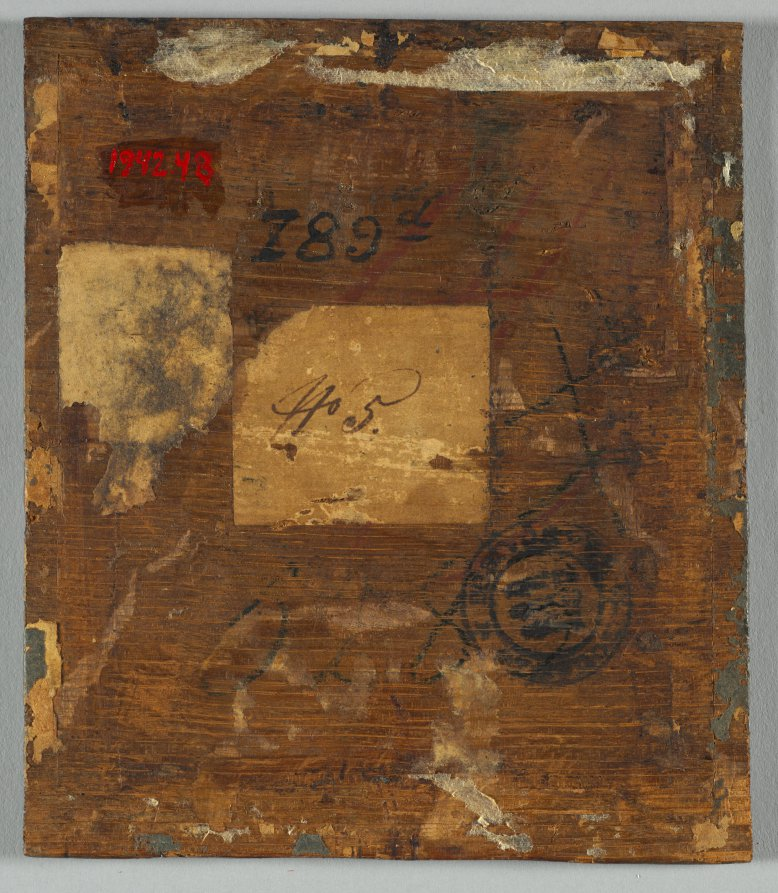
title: Portrait of a Woman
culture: Netherlandish, active France, 16th century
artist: Corneille de Lyon (Netherlandish, 1500/10–1574)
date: c. 1540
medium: oil on wood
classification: Painting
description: Corneille de Lyon worked both for the French court and wealthy merchants. His distinctive northern style stood in contrast to the taste for Italian Renaissance painting and connected closely to portrait miniatures and manuscript painting. Recent conservation treatment has restored the smooth, enamel-like background and the meticulous rendering of detail.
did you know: Gold leaf was applied to the details of the sitter’s headdress and embroidery on her dress.